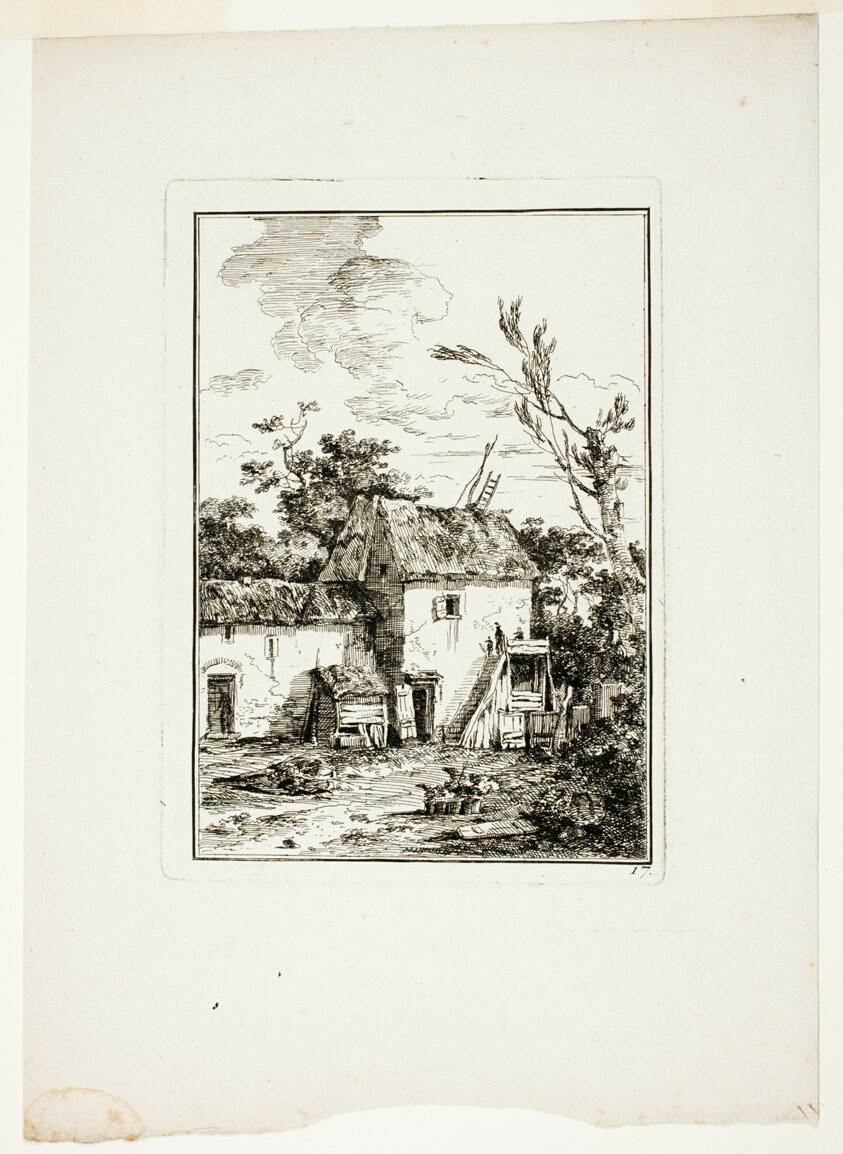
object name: Print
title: Vertical Landscape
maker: Louis Gabriel Moreau (French, 1740-1806)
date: c. 1779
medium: Etching on ivory wove paper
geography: France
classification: etching; print; prints and drawing